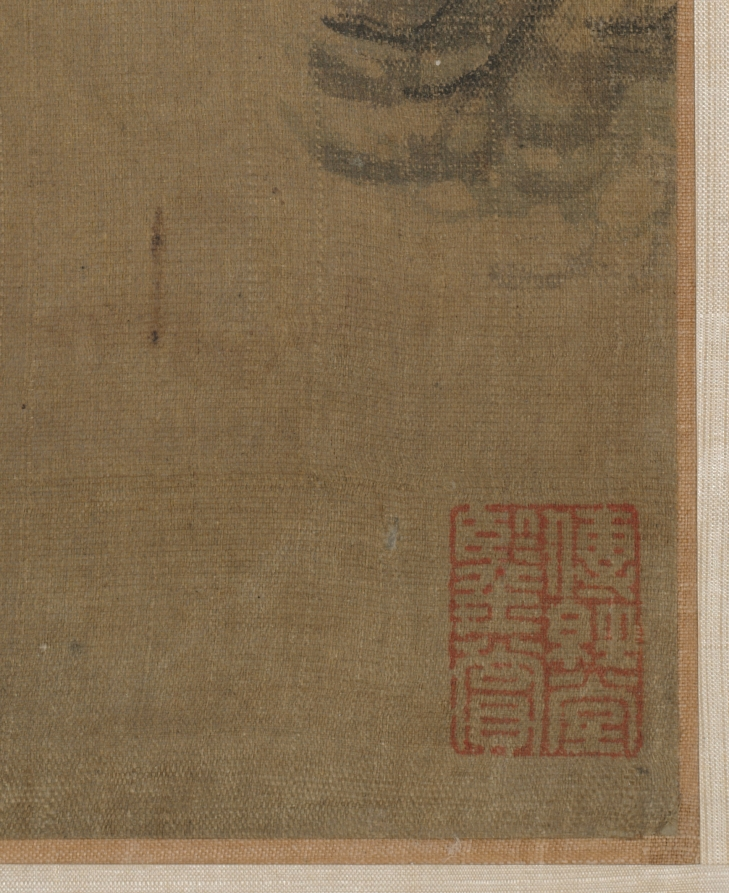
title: Lonely Retreat Overlooking a Misty Valley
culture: China, Ming dynasty (1368–1644)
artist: Sheng Maoye (Chinese, active early 1600s)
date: 1630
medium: hanging scroll; ink and slight color on silk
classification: Painting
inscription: Artist's inscription, signature, and 2 seals: In the tenth month of the gengwu year of the Chongzhen era [1630]. Sheng Maoye [seals] Sheng yin Maoye; Yuhua shi.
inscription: 4 additional seals of Liu Shu (1759–1816)